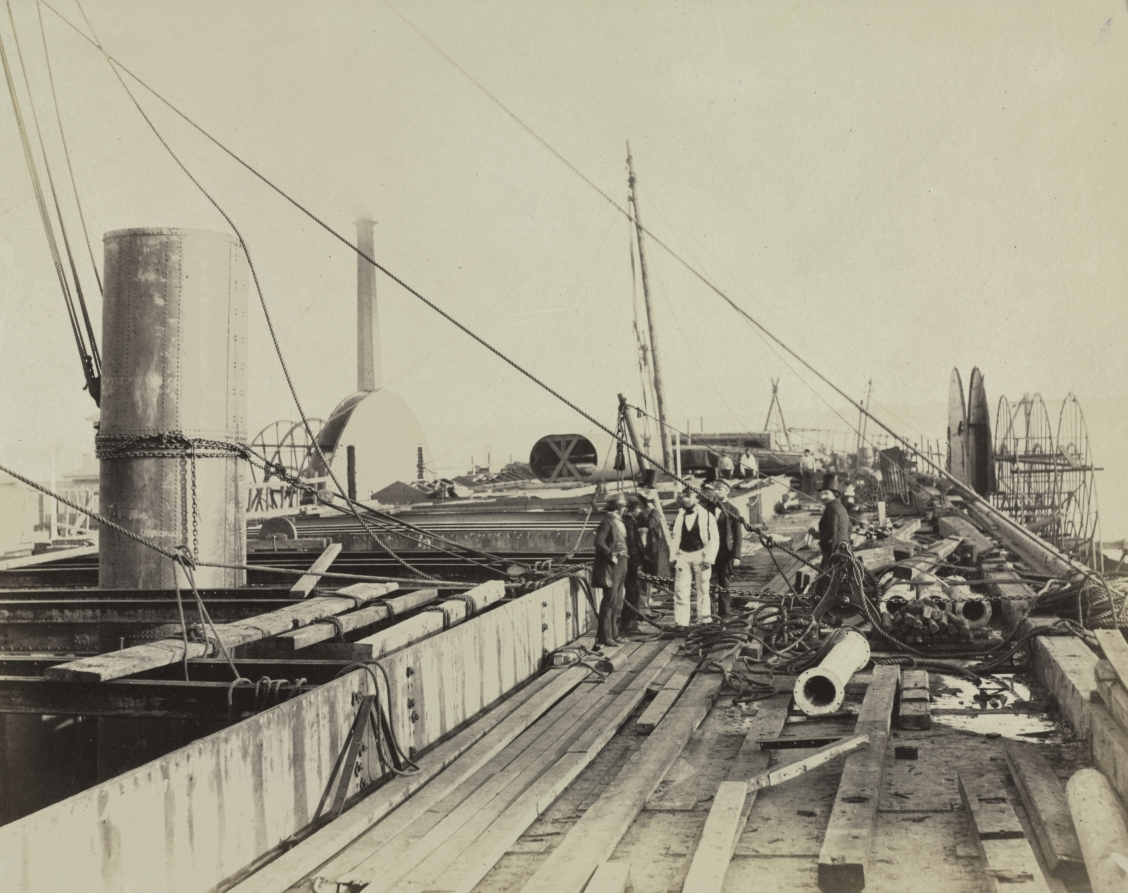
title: Deck Scene of the Great Eastern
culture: England, 19th century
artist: Robert Howlett (British, 1831–1858)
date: 1857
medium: albumen print from wet collodion negative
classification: Photograph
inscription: Written on verso of mount in pencil: "109"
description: A leading professional photographer of the mid-1850s, Robert Howlett is best known for his extended group of photographs documenting the construction and launching of the Great Eastern steamship. Designed by one of the greatest engineers of his time, I.K. Brunel, the Great Eastern took over four years to construct and, because of its immense size, an unprecedented three months to launch. For over forty years, the Great Eastern was the largest steamship ever constructed and it became a symbol of Great Britain's national pride and industrial supremacy. In this image, Howlett has captured the steamship's deck in the midst of construction while laborer's stand idly in the background and gentleman and engineers seem to confer in the foreground.